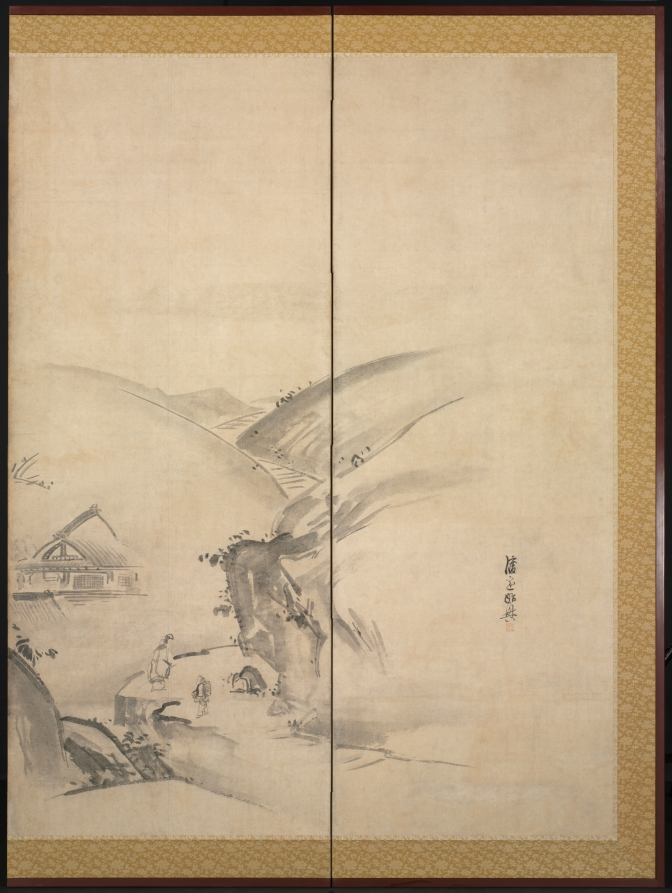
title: Eight Views of the Xiao and Xiang Rivers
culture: Japan, Edo period (1615–1868)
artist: Watanabe Shikō (Japanese, 1683–1755)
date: 1700s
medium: Six-panel folding screen, ink on paper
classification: Painting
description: Watanabe Shiko, an Edo period painter who combined Kano school style with Rimpa style, re-created the Xiao and the Xiang rivers on a pair of eight-panel screens. For this composition, he followed the Kano school’s sense of space, adapted from miniature copying paintings (shukuzu) by the Japanese artist Kano Tanyu. Watanabe revised the typical representations of the Xiao and the Xiang rivers by rendering the theme Wild Geese Descending to Sandbar on the right screen and Evening Bell from Mist-Shrouded Temple on the left screen. He depicted simple motifs—moon, boat, geese, and temple—to suggest the other scenes while also creating airy space.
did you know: This screen forms a pair with CMA 1960.284.